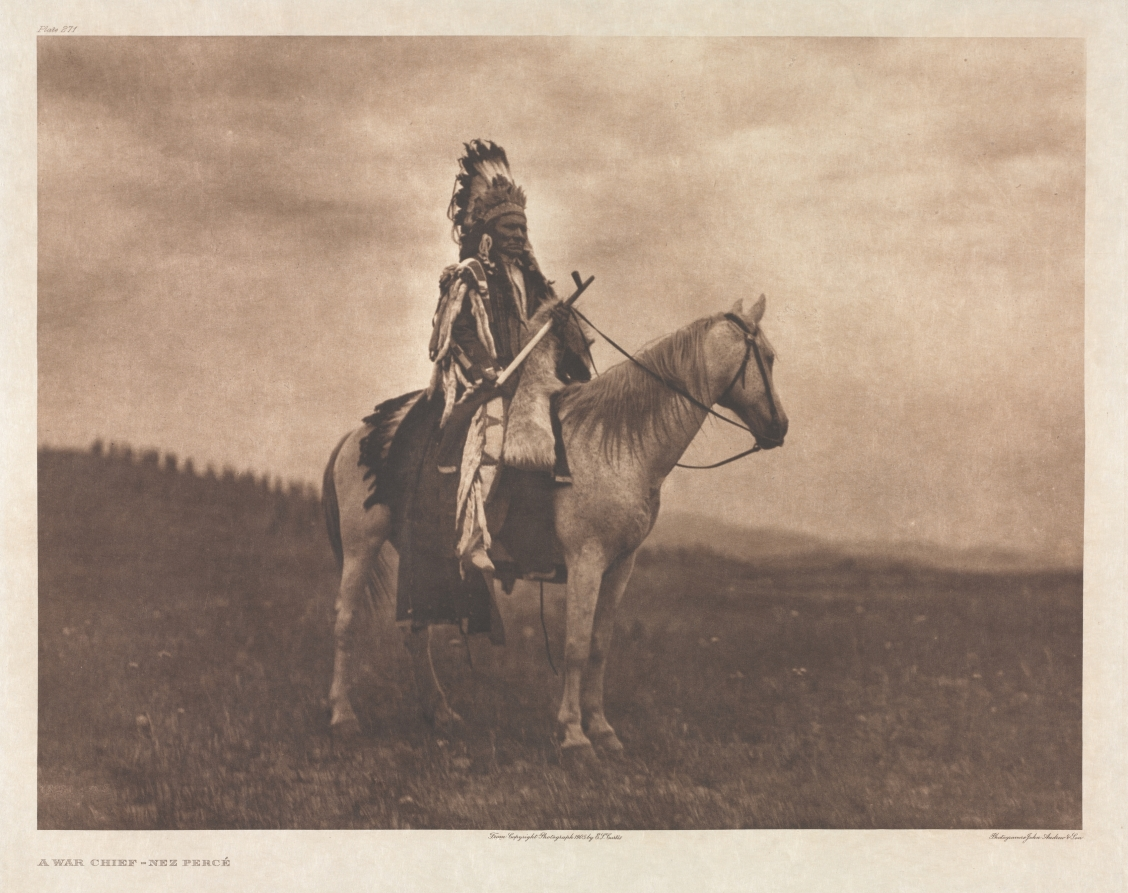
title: Portfolio VIII, Plate 271: A War Chief - Nez Percé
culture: America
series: The North American Indian: being a series of Portfolios picturing and describing the Indians of the United States, the Dominion of Canada, and Alaska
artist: Edward S. Curtis (American, 1868–1952)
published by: The University Press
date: 1905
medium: photogravure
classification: Portfolio